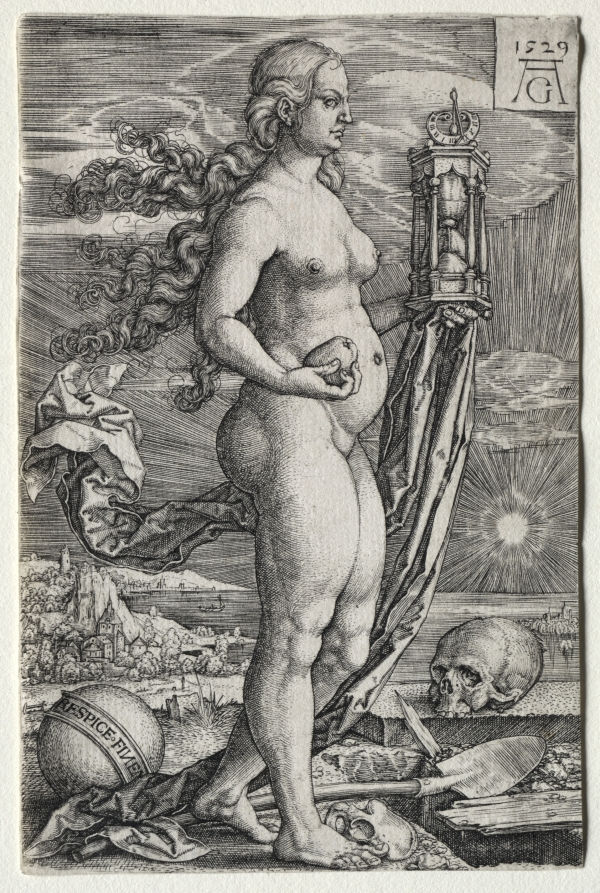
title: Respice Finem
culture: Germany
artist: Heinrich Aldegrever (German, 1502–1555/61)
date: 1529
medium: engraving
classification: Print